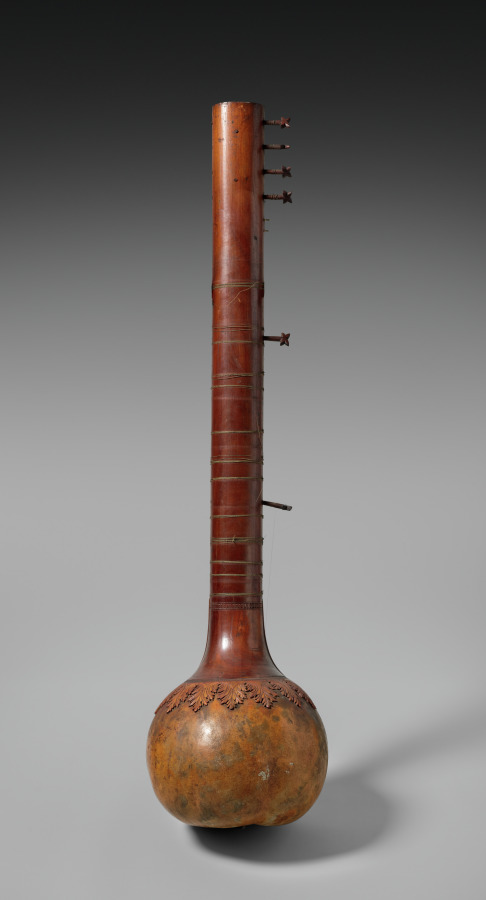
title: Sitar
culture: East India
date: 1800s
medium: Gourd, wood, ivory inlay, ebony? inlay, gut, and metal strings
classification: Musical Instrument